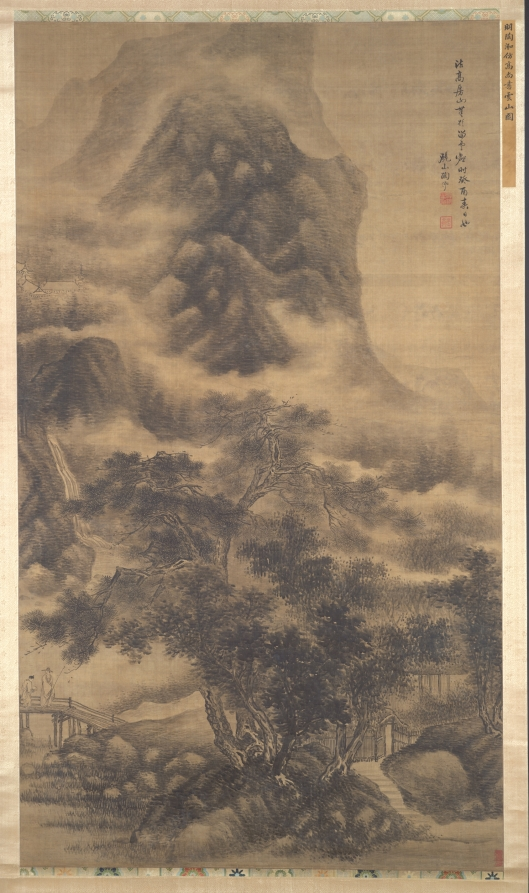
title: Clouds Visiting a Mountain Retreat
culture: China, Ming dynasty (1368–1644)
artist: Tao Hong (Chinese, active c. 1610–1640)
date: 1633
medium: Hanging scroll; ink on silk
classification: Painting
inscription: Artist's inscription, signature and two seals: Imitating Kao Fan-shan's [Kao K'o-kung's] brush at Liu-yün-ho [Valley of Lingering Clouds] during a spring day in the kuei-yu year [1633]. Yen-shan, T'ao Hung [seals] T'ao Hung chih-yin; tzu Ch'iu-shui. (Translated by Wai-Kam Ho)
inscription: 1 additional seal unidentified.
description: Little is known about Tao Hong who settled in Nanking in the latter part of his life. His son was a friend of the leading Nanjing school artist Gong Xian (on display nearby). When the Ming dynasty collapsed in 1644, Tao joined the loyalist resistance in Yunnan province. By 1645 the Manchu invaders had defeated the Yunnanese forces, prompting Tao to flee to Burma, where he died shortly thereafter. Only five of Tao Hong’s works are known to exist, of which this painting is the largest.